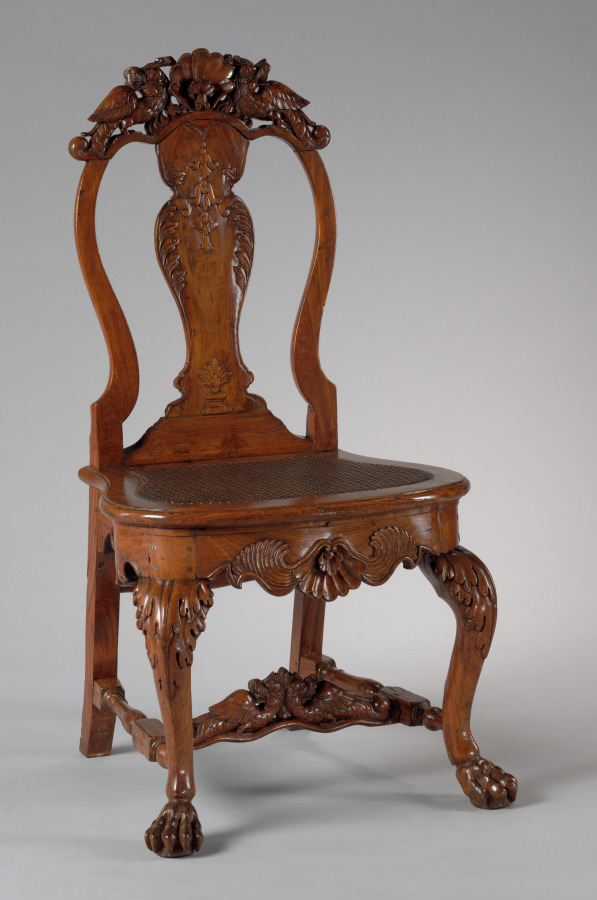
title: Side Chair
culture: Netherlands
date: 1705–15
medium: tulipwood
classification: Furniture and woodwork